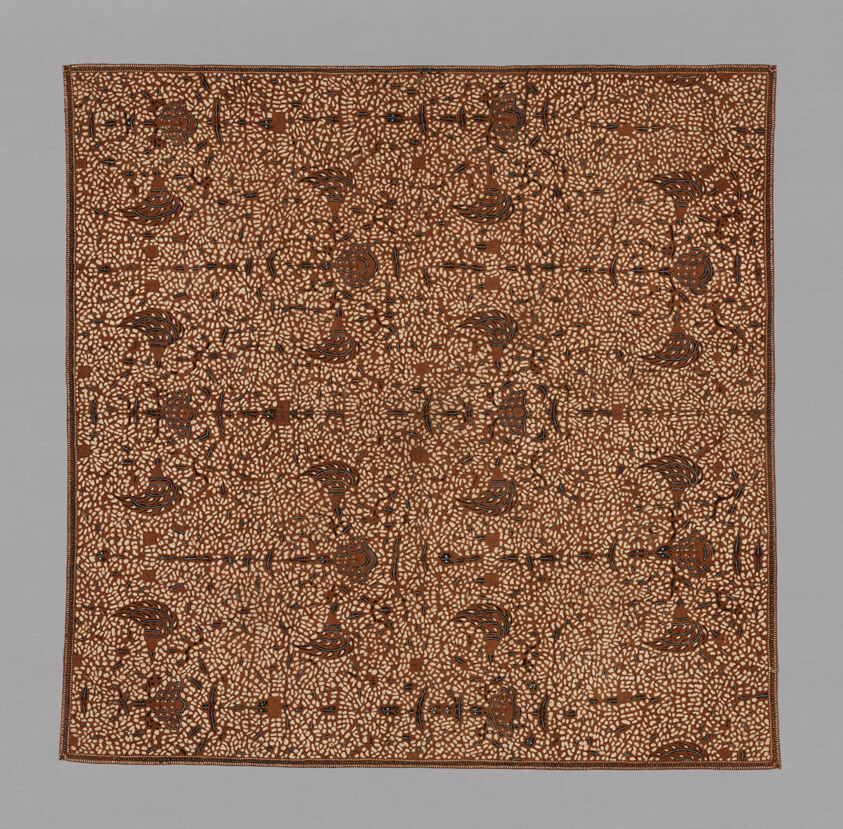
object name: Costume and Accessories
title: Iket (Headcloth)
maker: Indonesia, Java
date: 19th century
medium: Cotton, batik dyed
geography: Java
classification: textile; weaving; costume; dress (garment); clothing